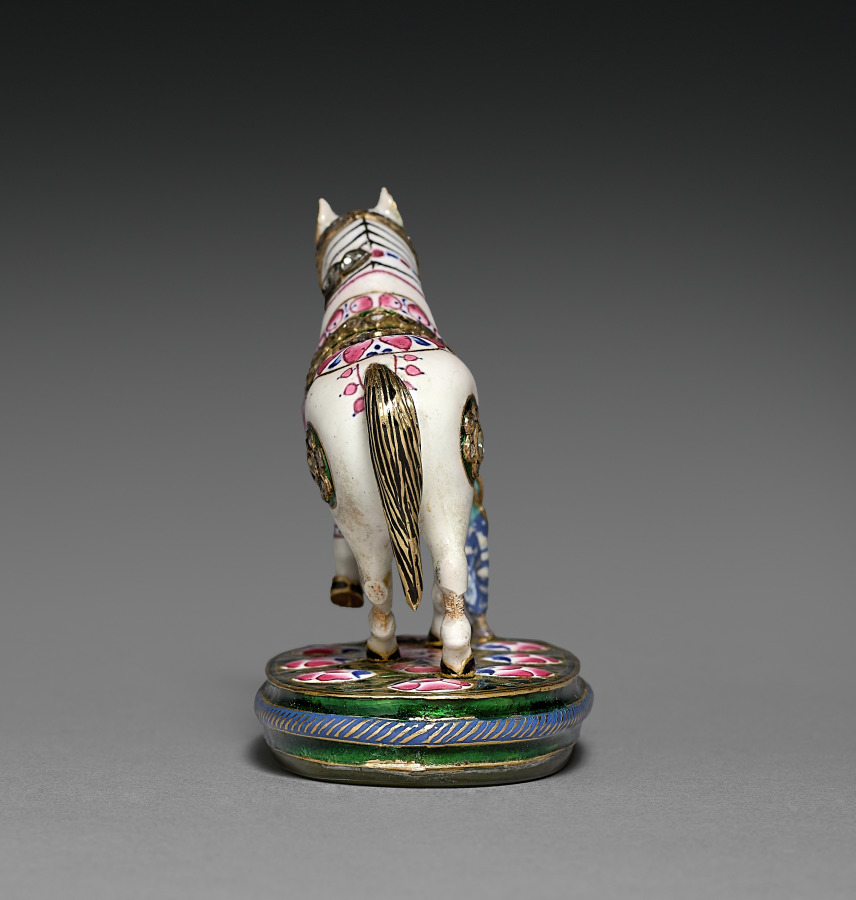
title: Ladies Hand Mirror with Horse as Handle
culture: India, Jaipur, late 18th-19th Century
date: late 1700s-1800s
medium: enamel inlaid with semi-precious stones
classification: Enamel